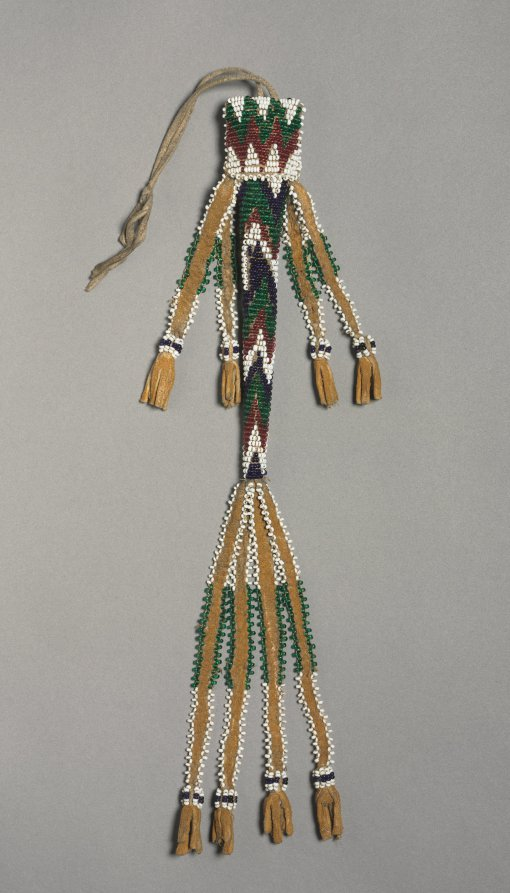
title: Awl Case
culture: Native North America, Plains, Gaigwu (Kiowa)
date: c. 1890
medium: Native-tanned hide, glass beads, cotton thread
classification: Leather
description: Plains women hung small bags often decorated with beads from their belts to keep their most important tools at hand. This one contained an awl, a shaft of bone, stone, or metal that tapered to a point and had many functions. One of the most important was to sew animal hides into garments: the awl was used to punch small holes in the hide, and then a thread made of animal sinew was laced through the holes and pulled tight.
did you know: Plains women hung small bags often decorated with beads from their belts to keep their most important tools at hand.